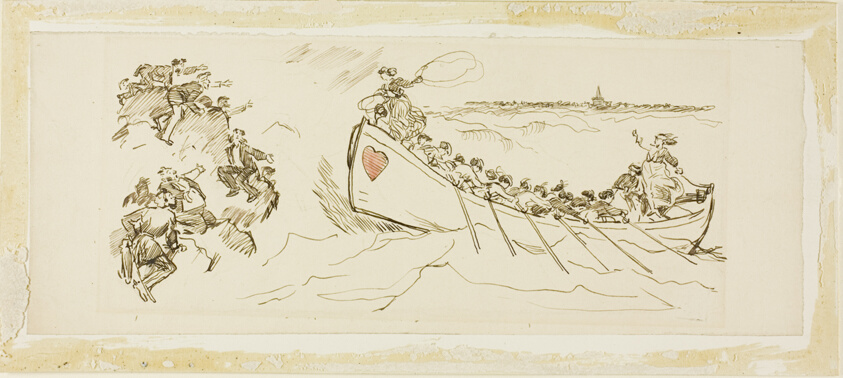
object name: Drawing and Watercolor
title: Life Boat Full of Women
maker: Attributed to Charles Samuel Keene; British, 1823-1891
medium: Pen and brown ink, with brush and red watercolor, over traces of brown pencil, on buff wove paper, laid down on ivory wove card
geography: England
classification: pen and ink drawings; drawings (visual works); prints and drawing